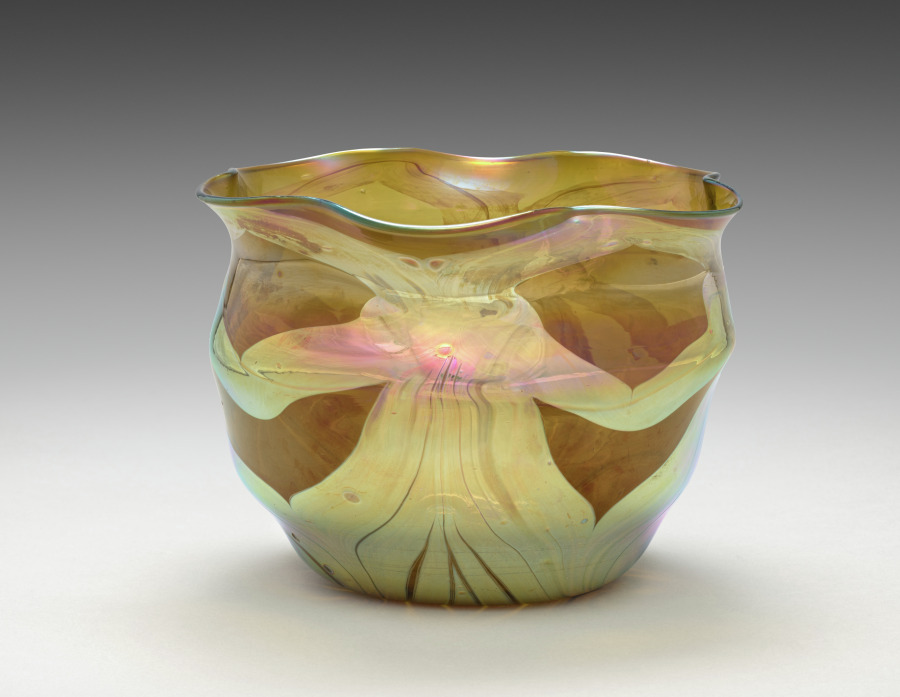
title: Bowl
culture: America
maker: Tiffany Glass & Decorating Company (America, New York, 1892–1902)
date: c. 1896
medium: Favrile glass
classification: Glass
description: Among his many achievements in the decorative arts, Louis Comfort Tiffany invented a type of glass with unprecedented opalescence that he patented under the name Favrile, derived from an Old English word meaning "handcrafted." Tiffany memorably described his Favrile glass as "distinguished by brilliant or deeply toned colors, usually iridescent like the wings of certain American butterflies, the necks of pigeons and peacocks, the wing covers of various beetles."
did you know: Located in Lake View Cemetery in Cleveland, Wade Memorial Chapel features an interior designed by Tiffany.